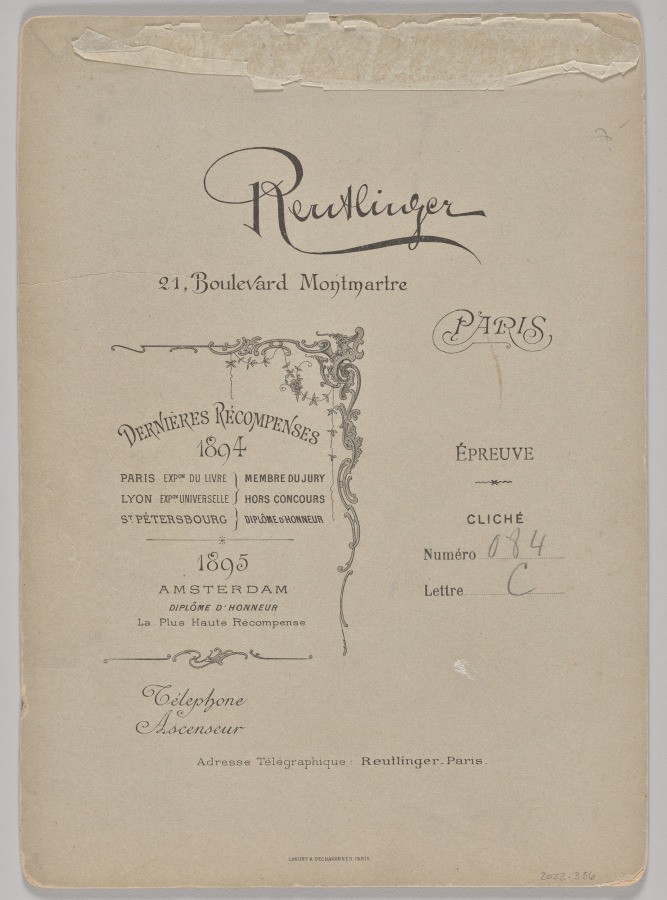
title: Untitled (young boy with lace collar and toy rifle)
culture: France, 19th century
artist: Reutlinger Studios (French, active 1850s-1937)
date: 1880–99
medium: gelatin silver print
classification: Photograph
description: This portrait of a boy holding a rifle suggests an association of masculinity with militarism in that era. Militaristic attitudes had a strong hold in France following the country’s defeat in the 1870–71 Franco-Prussian War. Many French people wanted revenge for Prussia’s annexation of Alsace-Lorraine, territories that did not return to French control at the end of World War I in1919. Looking at this portrait in hindsight, one might wonder if this boy served in the military or was a casualty during that war.